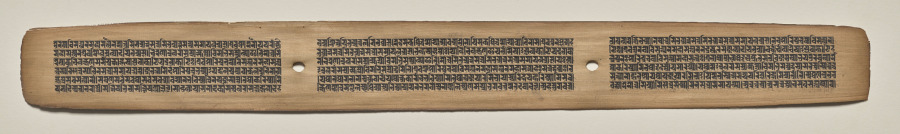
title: Text, Folio 128 (recto), from a Manuscript of the Perfection of Wisdom in Eight Thousand Lines (Ashtasahasrika Prajnaparamita-sutra)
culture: Eastern India, Bihar, Vikramashila Monastery. Painting: Nepal, Kathmandu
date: Sunday, September 14, 1119 (year 239 of the Newar Samvat in the month of Ashvina)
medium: gum tempera and ink on palm leaves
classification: Painting